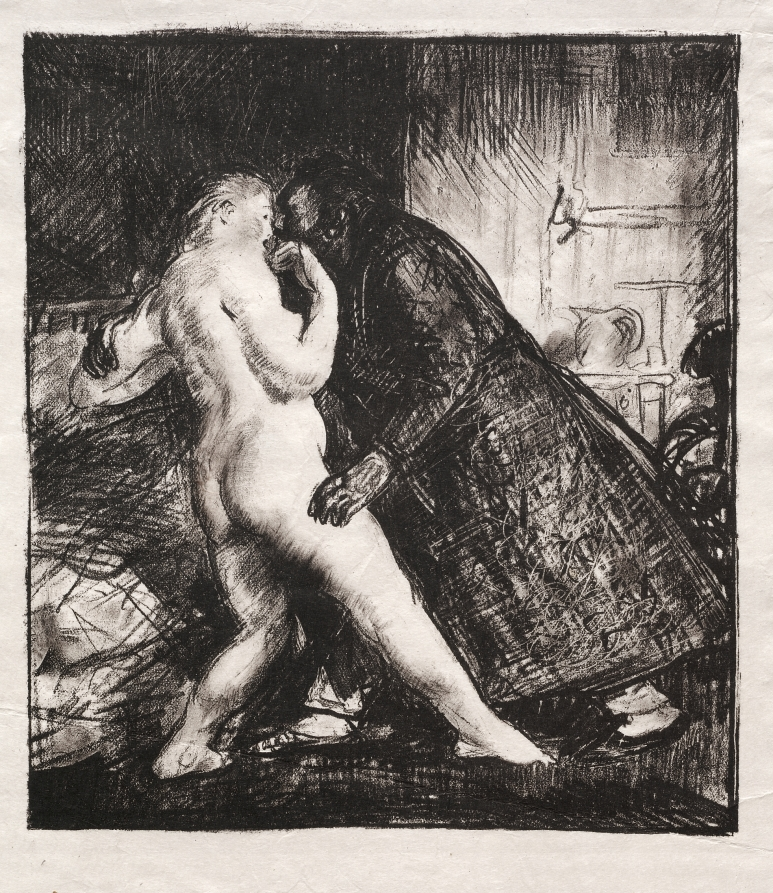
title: The Old Rascal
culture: America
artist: George Bellows (American, 1882–1925)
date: 1916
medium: lithograph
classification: Print